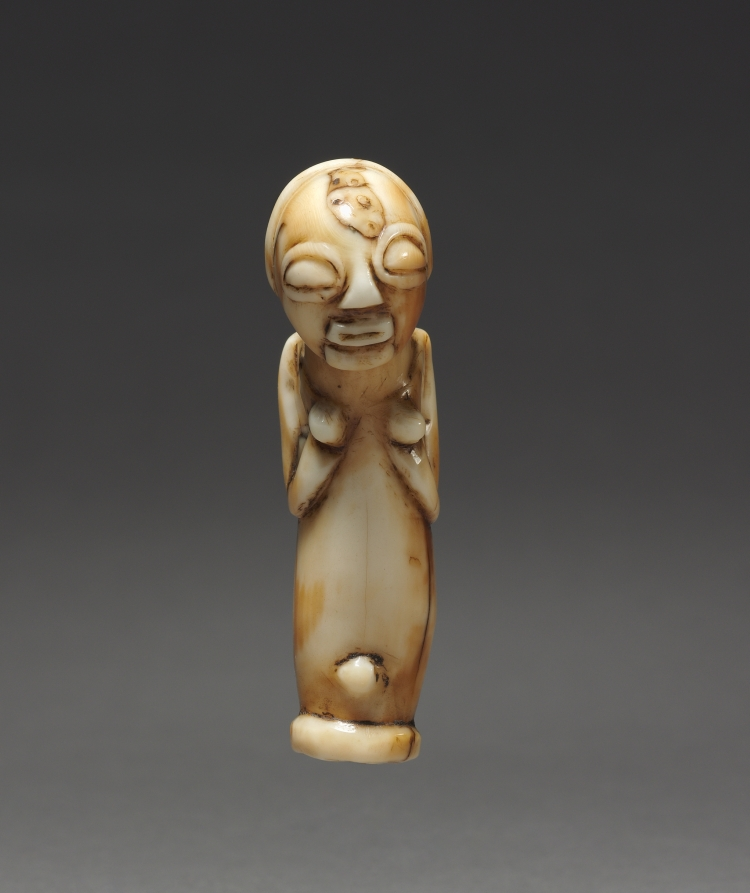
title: Pendant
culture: Africa, Central Africa, Democratic Republic of Congo, Luba-style maker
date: late 1800s–early 1900s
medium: Ivory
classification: Jewelry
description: Luba pendants made in ivory or bone were originally suspended on a cord and worn diagonally across the chest of a high-ranking member of society. Often accompanied by amulets, beads, or small antelope horns, they represented ancestral spirits and served as portals to ancestral wisdom and beneficence. Many of these diminutive figurines hold their hands to their breasts as a sign of the secrets and wisdom they contain.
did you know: The caramel-colored patina of the ivory indicates the frequent usage of the pendant.